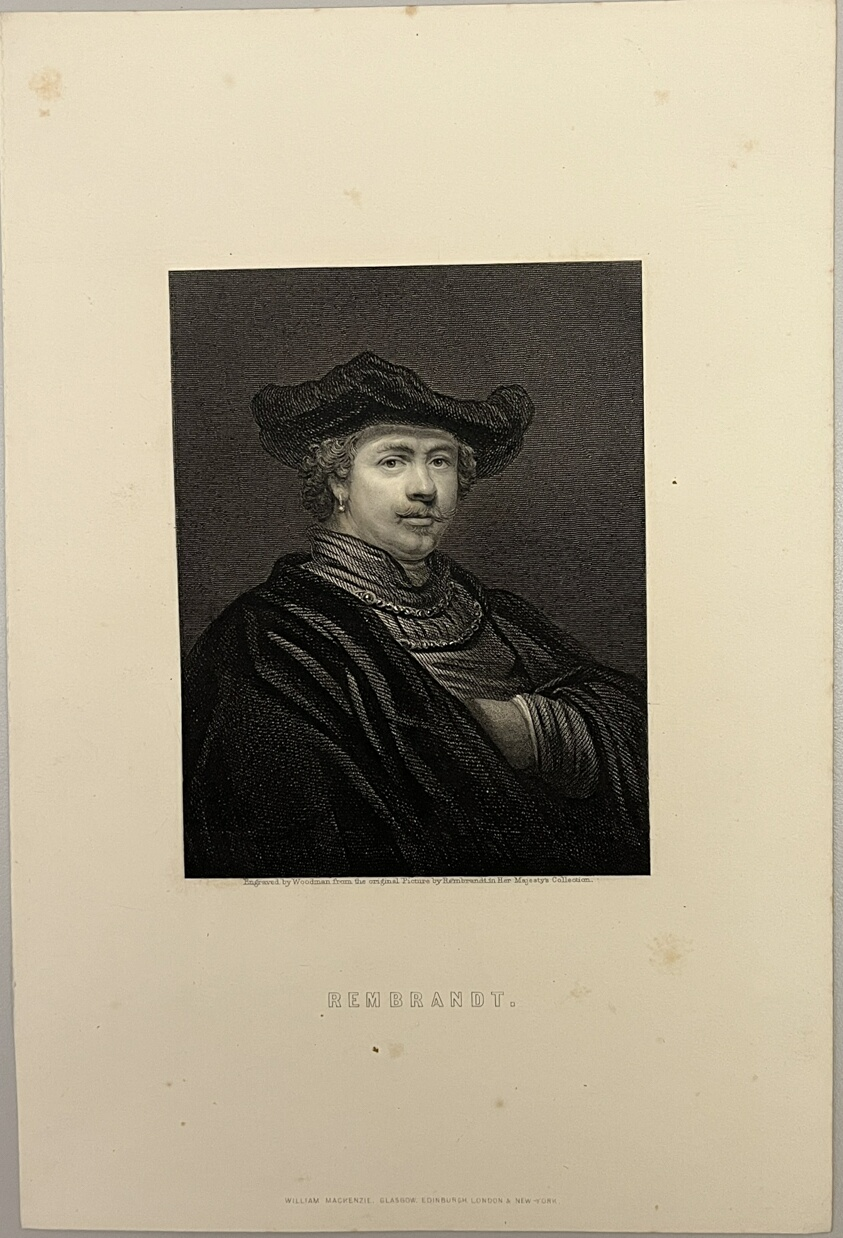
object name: Print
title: Rembrandt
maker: Woodman (likely American or British, 19th century); after Rembrandt van Rijn (Dutch, 1606-1669)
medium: Steel engraving on paper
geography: United States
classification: reproduction; print; prints and drawing